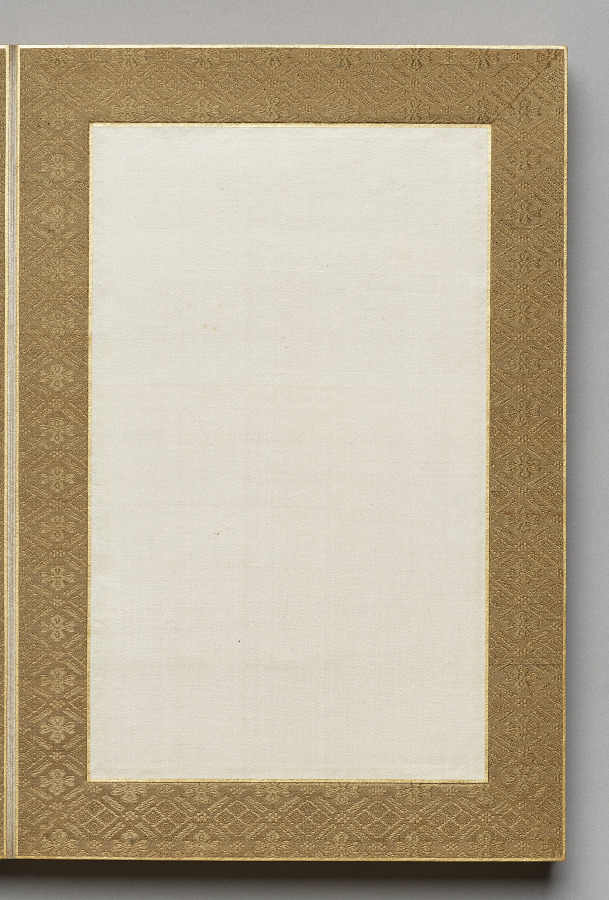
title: Painting from Flowers and Grasses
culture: Japan, Edo period (1615–1868)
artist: Tsubaki Chinzan (Japanese, 1801–1854)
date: 1841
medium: album; ink and color on silk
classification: Painting